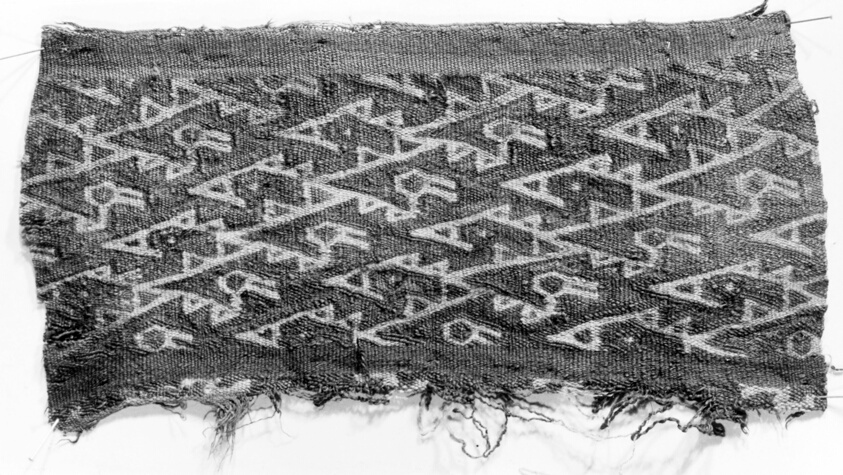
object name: Textile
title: Fragment (Border)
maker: Probably Ica; Peru, south coast, Ica Valley, Samaca, Ica Valley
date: A.D. 1000/1532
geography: Peru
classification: textile; weaving